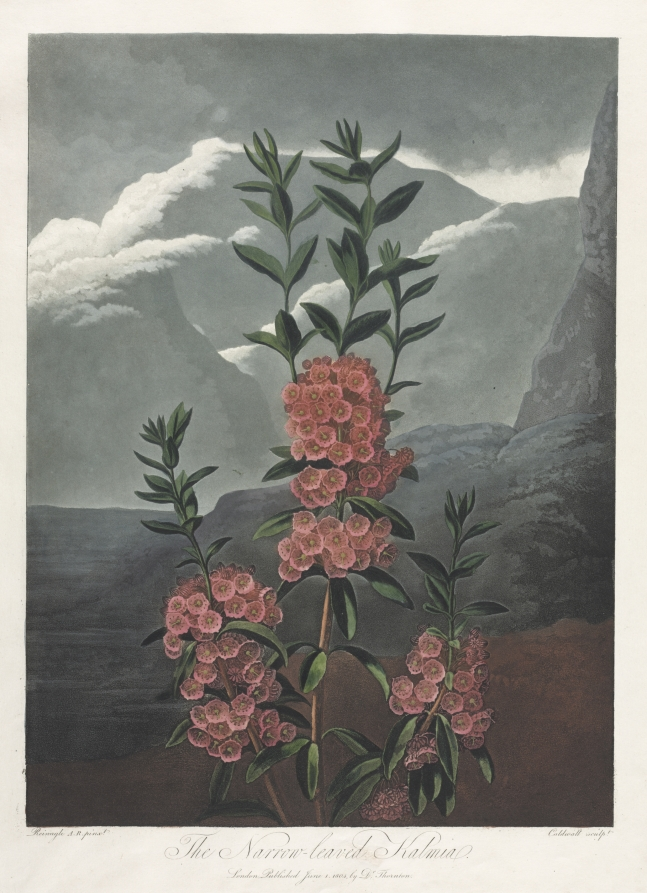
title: The Temple of Flora, or Garden of Nature: The Narrow-leaved Kalmia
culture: England, late 18th-early 19th Century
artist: Robert John Thornton (British, 1768–1837)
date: 1804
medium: aquatint, stipple and line engraving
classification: Print